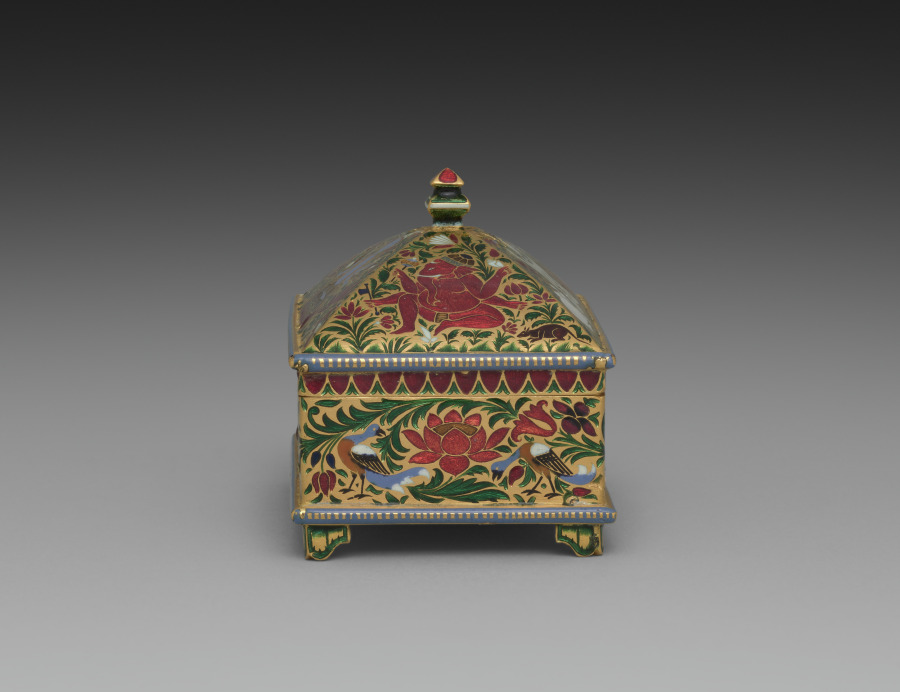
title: Box decorated with Shiva, Vishnu, Krishna, and Ganesha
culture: Northwestern India, Rajasthan, Rajput Kingdom of Jaipur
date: c. 1800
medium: gold with enamel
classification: Metalwork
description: This box is covered in a variety of birds, animals, and plants. The central motifs on the lids include images of four Hindu gods: Shiva, Krishna, Vishnu, and Ganesha. The blue figures are Vishnu and Krishna, the latter of which is an incarnation of the former who is shown playing a flute. The elephant-headed Ganesha is red and accompanied by his mount, the bandicoot rat Dinka. The four-armed Shiva is paired with two animals, including a tiger and his sacred bull mount Nandi. Small enamel boxes could be used to house many different substances, from cosmetics to spices to stimulants, including opium and paan, a digestive typically given at formal gatherings as a sign of the host’s hospitality.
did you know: Shiva’s mount is the bull; the tiger is the mount of his wife.